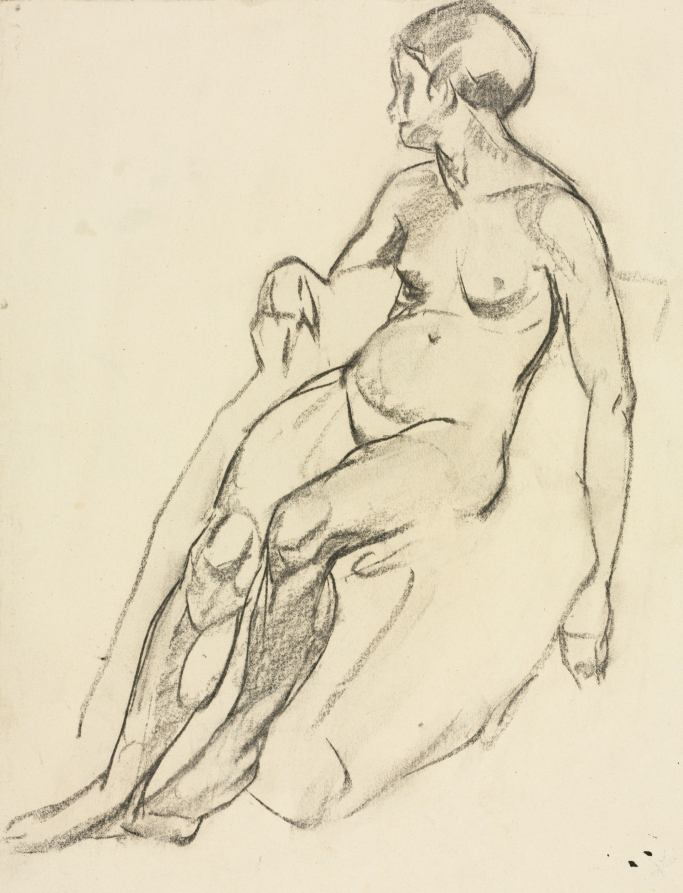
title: Seated Nude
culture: America, Ohio, Cleveland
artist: Alfred J. Wands (American, 1904–1998)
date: before 1926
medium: charcoal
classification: Drawing